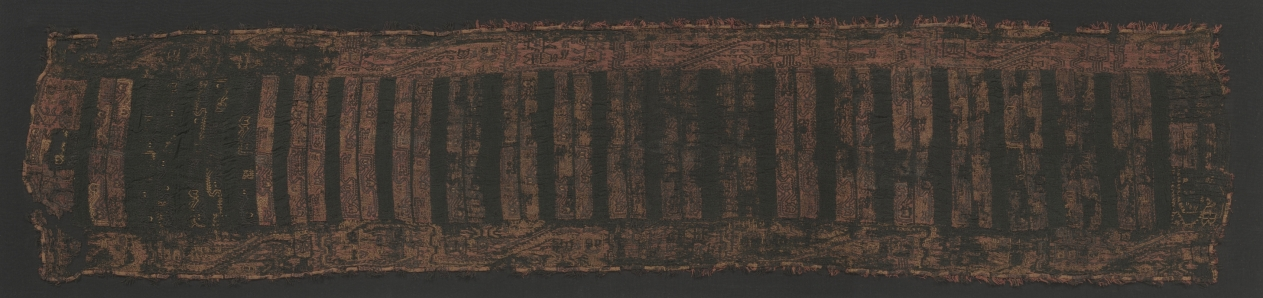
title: Headcloth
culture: Peru, South Coast, Paracas, Middle Period, c. 600-400 BC (Early Horizon, Epoch 10)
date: c. 600–400 BCE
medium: embroidery on tabby cloth; needle reseau and fringe at border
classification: Textile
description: The embroidered design consists entirely of felines, some of which are depicted with trophy heads. Both are very common motifs of Paracas art. The linear and highly stylized design as well as the limited spectrum of colors are characteristic of Paracas embroideries from the Middle Period.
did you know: Extremely dry conditions on Peru's desert coast allow for the extraordinary preservation of textiles.